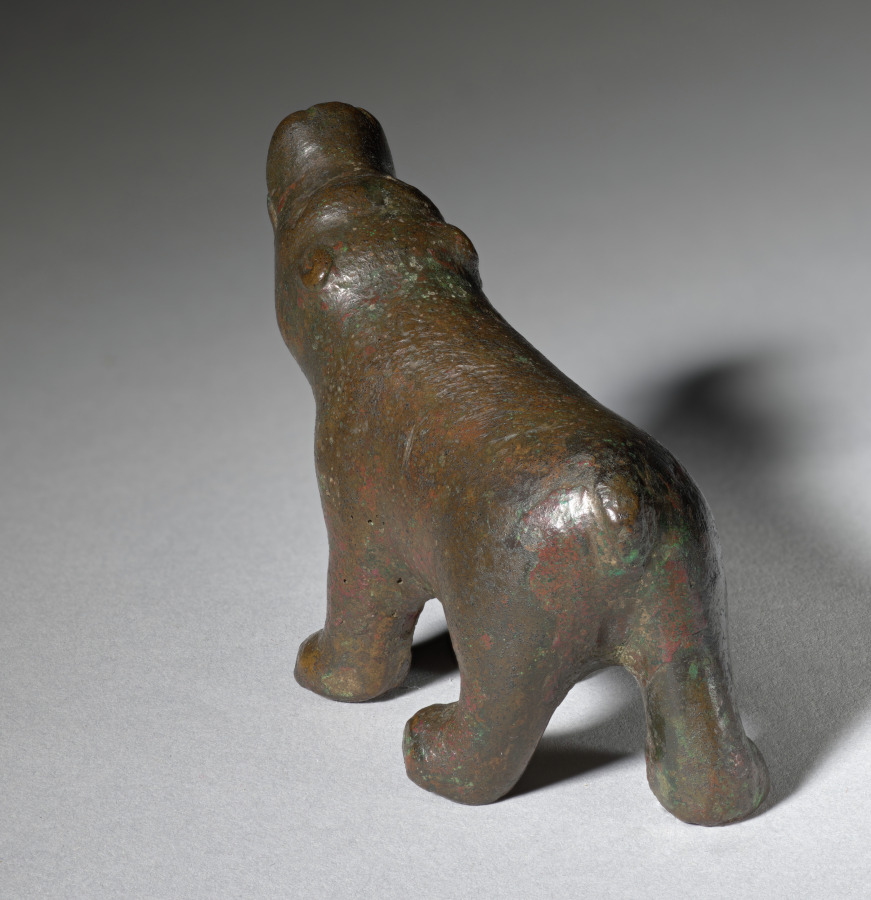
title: Hippopotamus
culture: Italy, Rome, Greco-Roman Period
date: 332 BCE–395 CE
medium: bronze, solid cast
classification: Sculpture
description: This hippopotamus steps forward with its rear left leg lifted off the ground and its head arched upwards. The hippopotamus was a Nilotic animal associated with Egypt and the Nile River that was brought to Rome and put on display in the Colosseum as part of venationes, or wild beast hunts. The rise of “Egyptomania” in the Roman Empire surged under the emperor Hadrian (reigned AD 117–38). Extant Egyptian examples of hippopotamus figurines are less animated and made of materials such as stone or pottery rather than bronze, making the pose and materiality of this object distinctly Greco-Roman.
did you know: The word hippopotamus is a Greek compound word combining “horse” (hippos) and “river” (potamos).